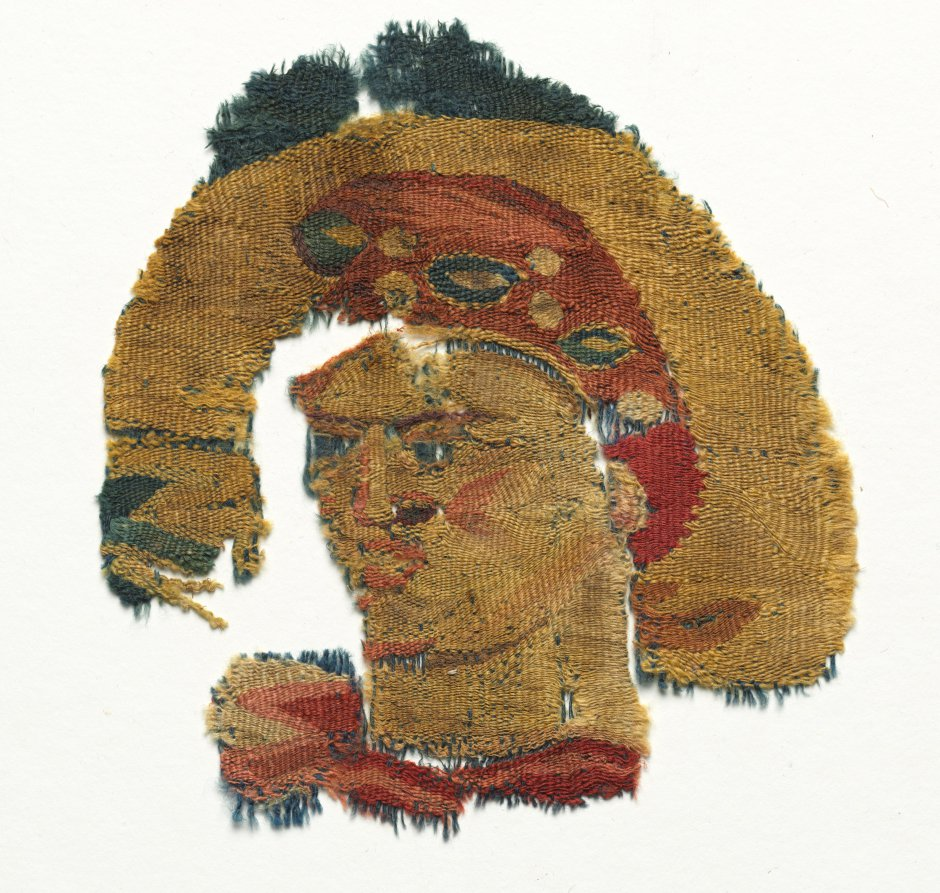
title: Human Head from a Large Curtain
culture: Egypt, Byzantine period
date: 300s CE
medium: tapestry weave, wool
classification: Textile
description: Distinguished by a halo, this unidentified person wears a jeweled cap encrusted with pearls alternating with other gems, possibly emeralds. The cap is similar to what the Greeks called a Phyrgian cap, worn by people from Central Asia. The fragment originally belonged to an all-woolen curtain or hanging. Fabrics woven entirely with wool were the most costly and admired.